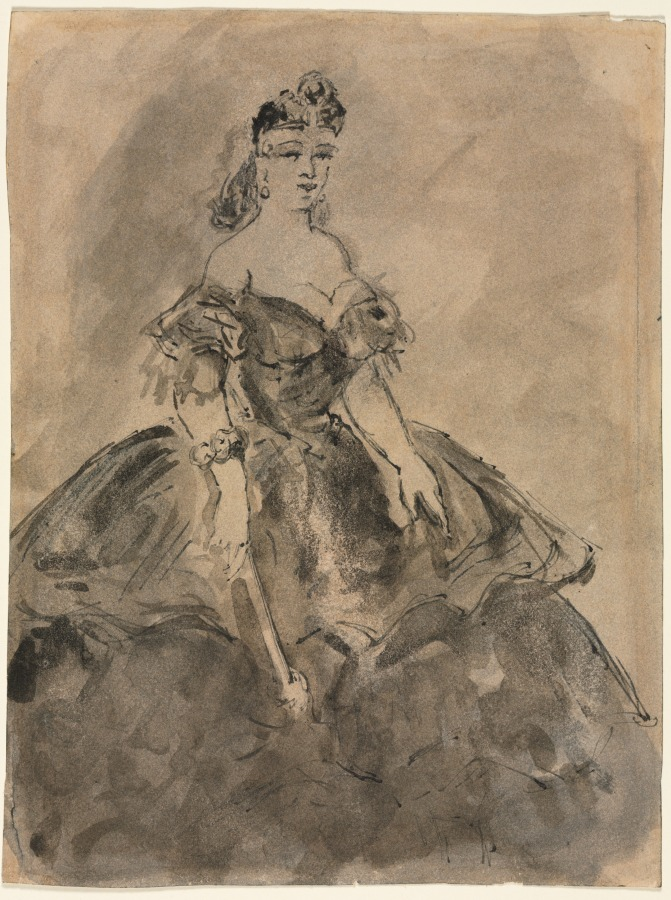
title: At the Ball (recto); La femme à l'éventail, after Goya (verso)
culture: France, 19th century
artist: Constantin Guys (French, 1805–1892)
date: 19th century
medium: pen and black ink and brush and gray wash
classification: Drawing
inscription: VERSO, lower right, in graphite: 16 ; lower right, in graphite: (455